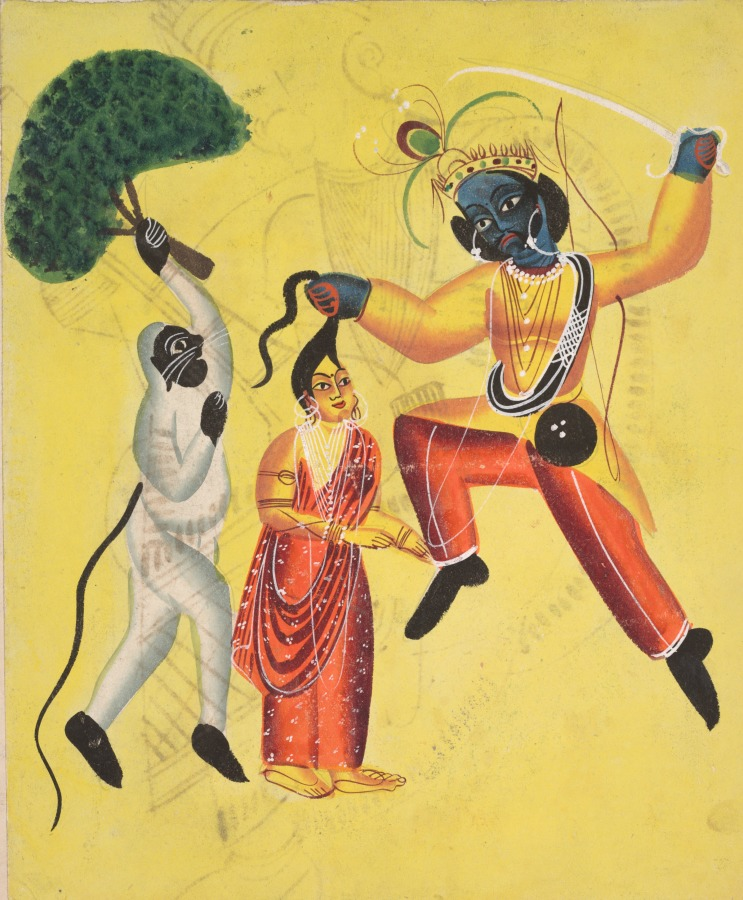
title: Hanuman attacks Indrajit holding an apparition of Sita by the hair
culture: Eastern India, Bengal, Kolkata, Kalighat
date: c. 1890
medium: Gum tempera, graphite, and ink on paper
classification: Painting